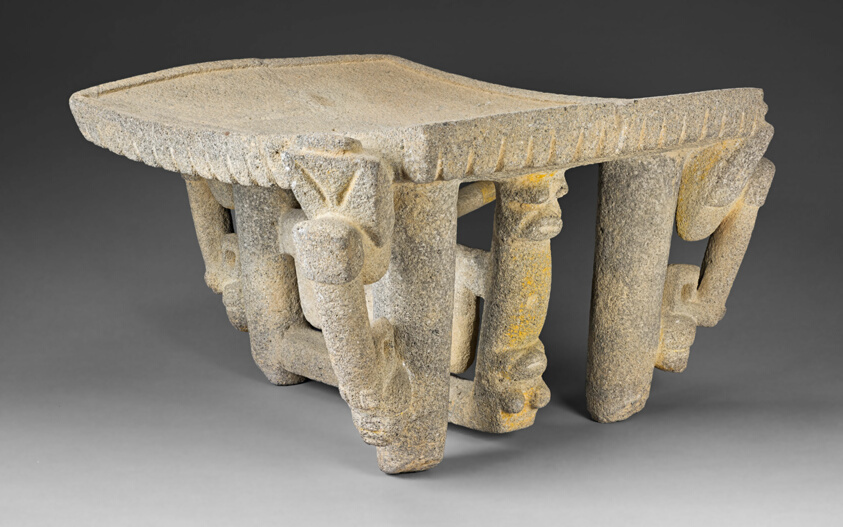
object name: Sculpture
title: Ceremonial Grinding Table (Metate)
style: nicoya, americas, lower central america, Arts of the Americas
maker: Nicoya (Nicoya, Guanacaste province, Costa Rica)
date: 1–500 CE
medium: Volcanic stone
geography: Nicoya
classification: stone; art of the americas; ceremonial object; metate; sculpture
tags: birds, animals, sacrifice